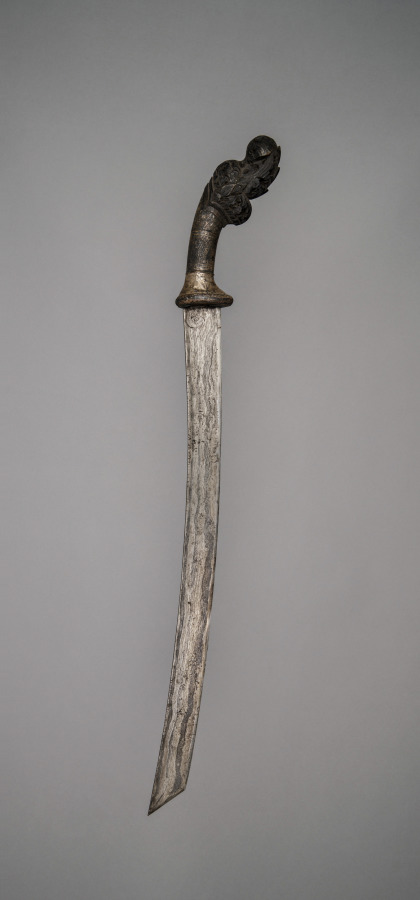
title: Sword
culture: Indonesia, Sulawesi (Celebes)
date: before 1918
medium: metal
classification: Arms and Armor